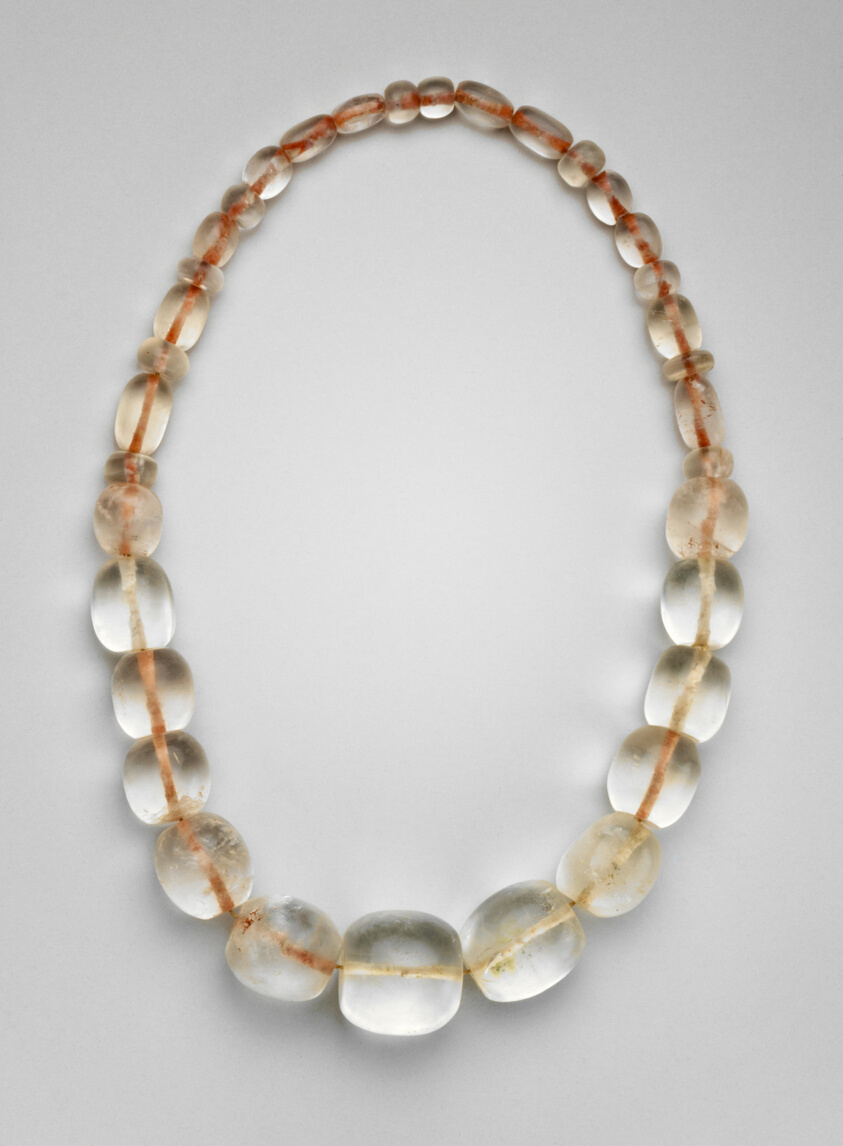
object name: Costume and Accessories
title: Necklace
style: chavín horizon, early horizon, Pre-Columbian, americas, andes, Arts of the Americas, andean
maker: Chavín (Chavín de Huantar, north coast, Peru)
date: c. 800 BCE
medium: Rock crystal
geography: Chavín de Huantar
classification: bead; art of the americas; jewelry; costume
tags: jewelry, elite, status